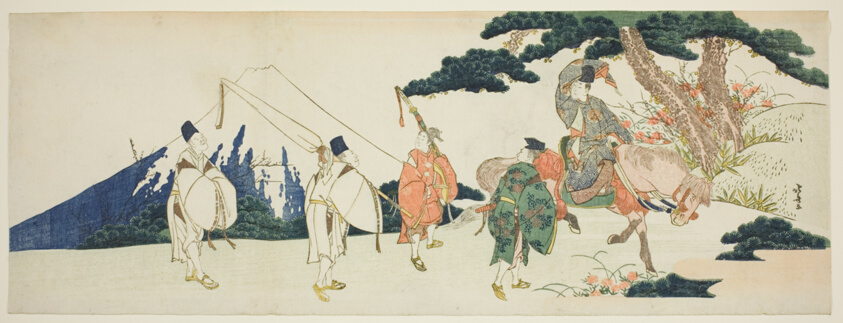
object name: Print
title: The Eastern Journey of the Celebrated Poet Ariwara no Narihira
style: Japanese (culture or style)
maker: Katsushika Hokusai 葛飾 北斎; Japanese, 1760-1849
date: c. 1806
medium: Color woodblock print; nagaban surimono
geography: Japan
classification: woodblock print; print; asian art